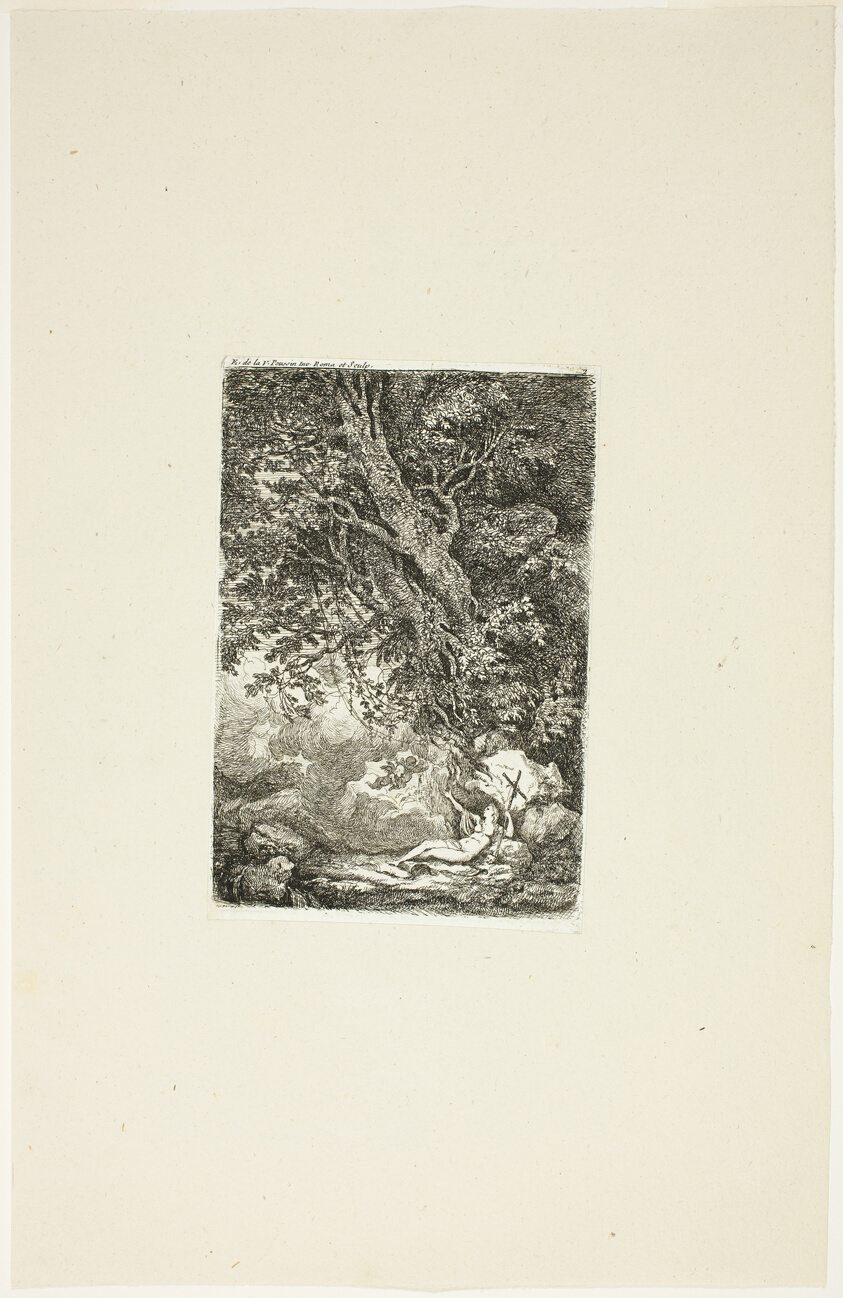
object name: Print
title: Mary Magdalene as a Penitent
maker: Etienne de Lavallee-Poussin; French, 1735-1802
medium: Etching on off-white laid paper, laid down on cream laid paper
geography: France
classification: etching; print; prints and drawing